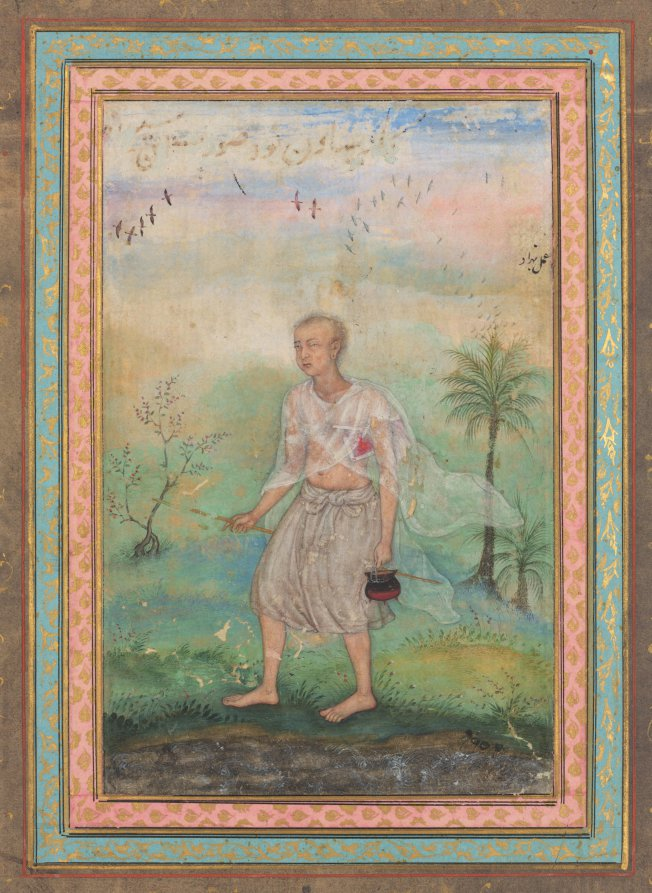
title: Jain Ascetic Walking Along a Riverbank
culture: Mughal India, court of Akbar (reigned 1556–1605)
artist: Basavana (Indian, active c. 1560–1600)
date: c. 1600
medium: gum tempera, ink, and gold on paper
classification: Painting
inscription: amal-i behzad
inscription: amal-i Basawan ... [?]chandra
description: Alluding to his wisdom, this white-clad Jain monk carries a manuscript under his left arm, bound with a red cover. Otherwise he carries a Jain monk’s basic accouterments: whisk broom, staff, and pot. This sensitively painted portrait was made for the collection of the Mughal emperor Akbar who was curious about the tenets of Jainism. He admired the explanations of the Jain monks who regularly attended the emperor’s weekly discussion sessions among members of different religious groups.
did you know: He carries a book and a fly whisk tucked under his left arm.